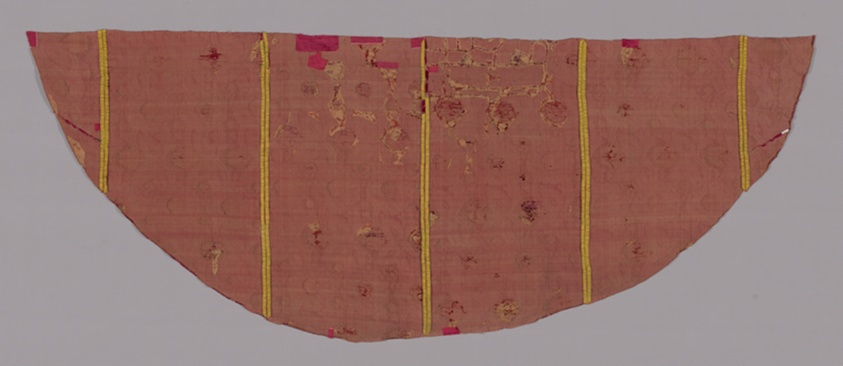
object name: Religious/Ritual Object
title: Cope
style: 15th century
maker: Italy, probably Venice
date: 1460-70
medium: Silk and gilt-metal-strip-wrapped silk, warp-float faced 4:1 satin weave with supplementary brocading wefts bound by main warps in weft-float faced 1:4 'S' twill interlacings and with supplementary pile warps forming cut voided velvet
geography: Venice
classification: weaving - velvet; liturgical; textile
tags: vestments, botanical/floral, flowers, foliage, fruit, pomegranates